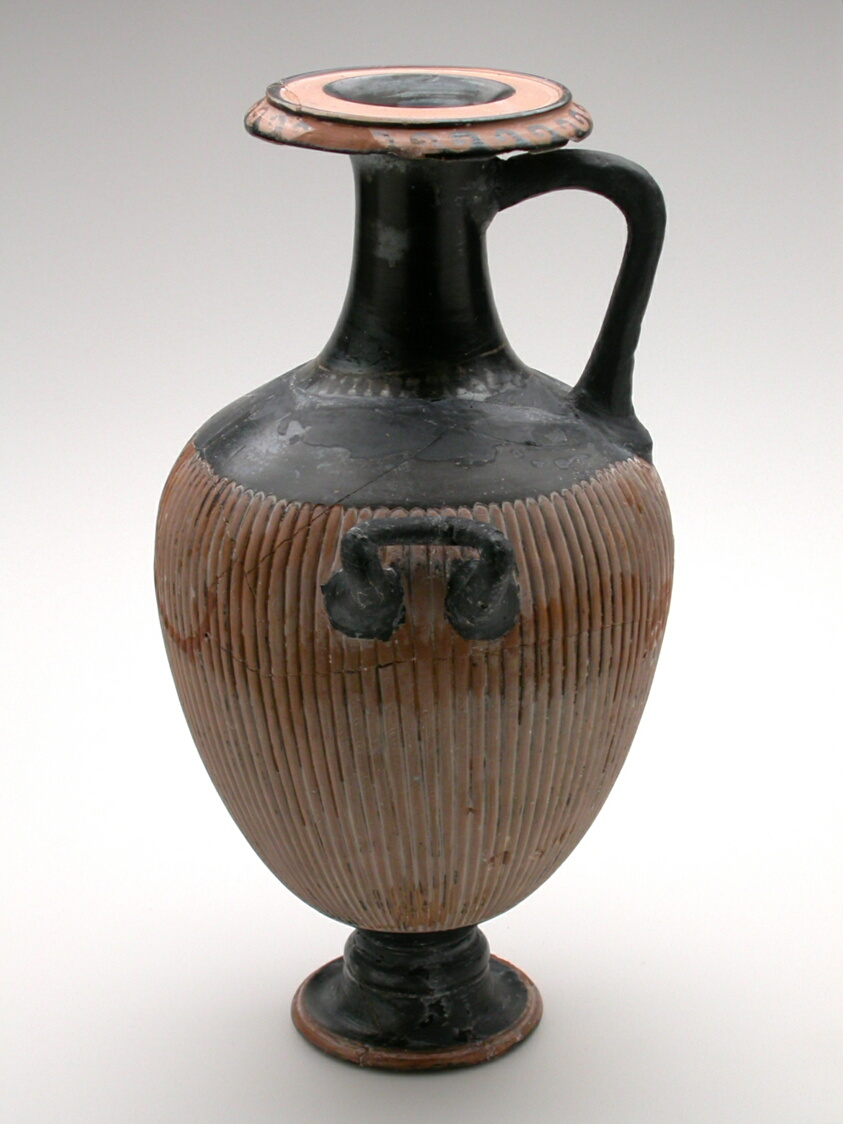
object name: Vessel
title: Hydria (Water Jar)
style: greek, apulian, ancient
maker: Greek; possibly Apulia or Campania, Italy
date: about 300 BCE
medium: terracotta, black-glaze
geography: Nola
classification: vessel; ceramics; ancient art